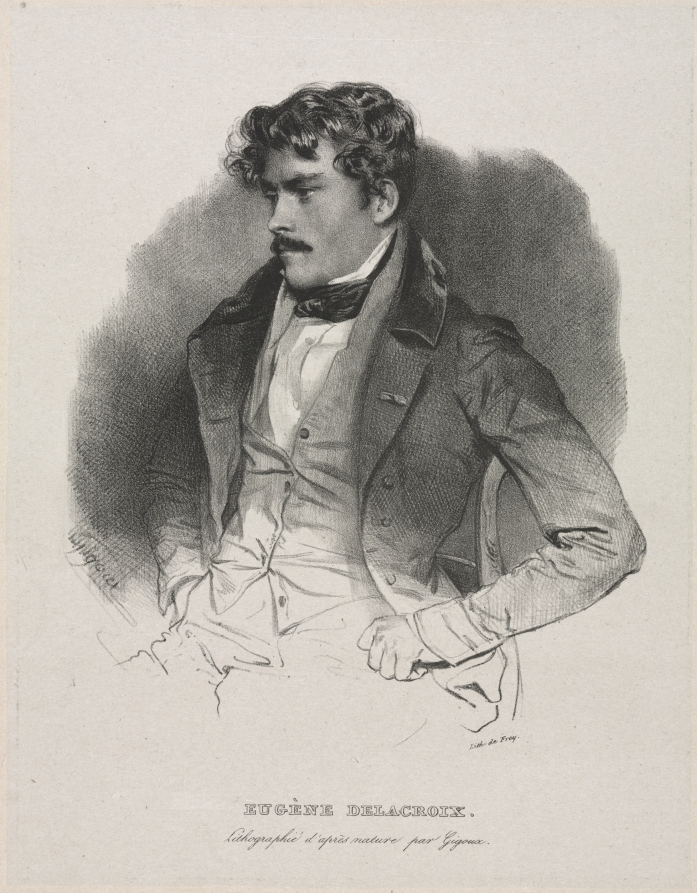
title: Eugène Delacroix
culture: France, 19th century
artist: Jean Francois Gigoux (French, 1806–1894)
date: c. 1832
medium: lithograph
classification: Print